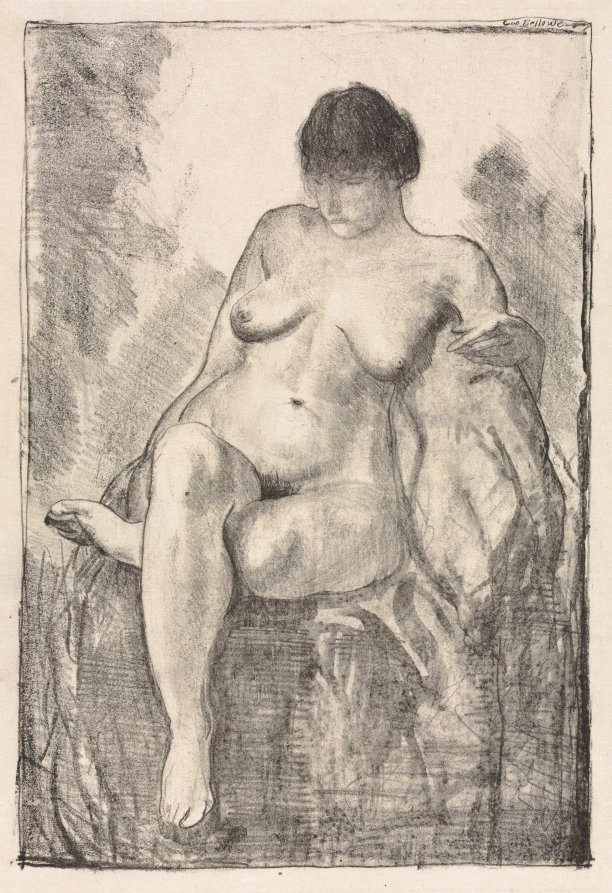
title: Nude Woman Seated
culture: America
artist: George Bellows (American, 1882–1925)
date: 1916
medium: lithograph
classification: Print